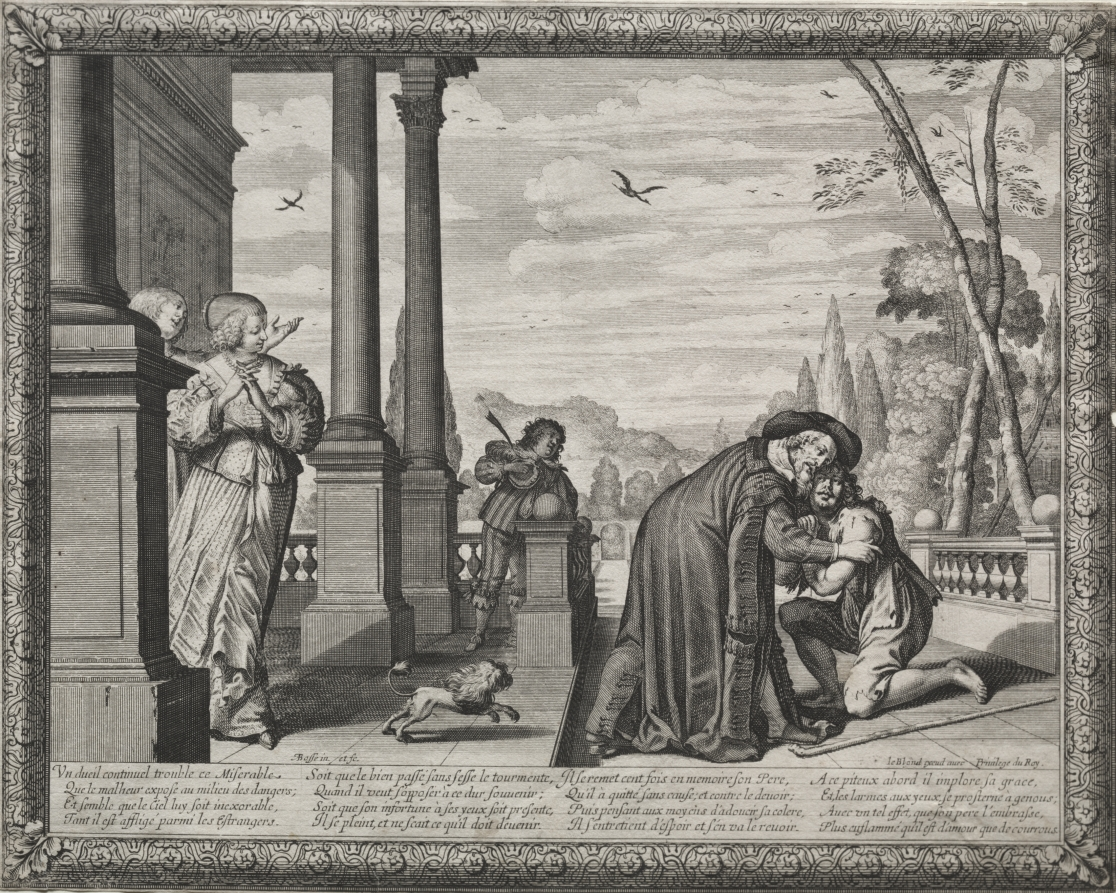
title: The Prodigal Son: The Return of the Prodigal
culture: France, 17th century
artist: Abraham Bosse (French, 1602–1676)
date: 1635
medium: etching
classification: Print